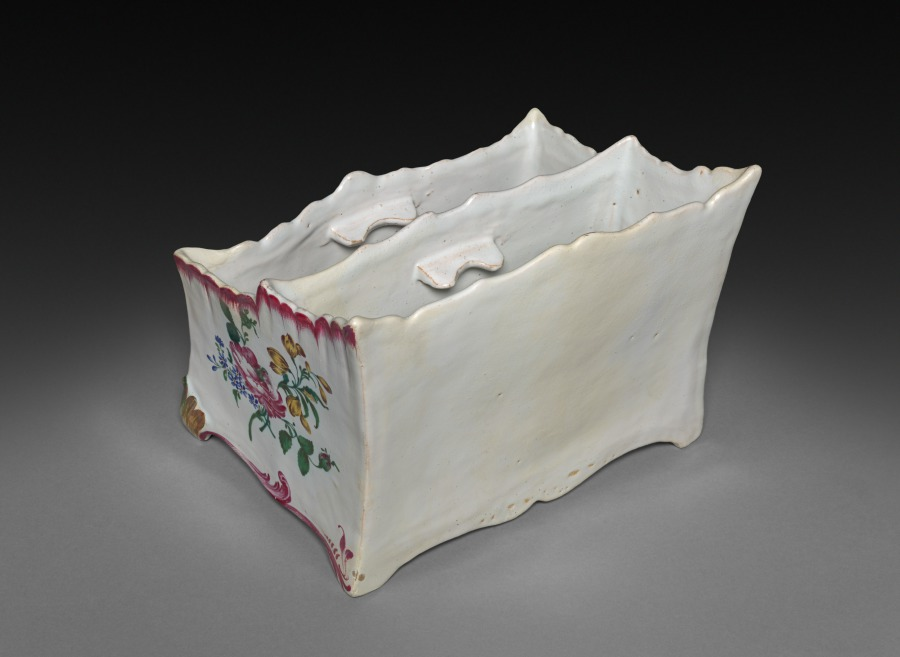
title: Flower Holder (Bouquetiere)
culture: France, 18th century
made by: Sceaux Factory (French, active 1748–66)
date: 1765–1770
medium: faience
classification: Ceramic